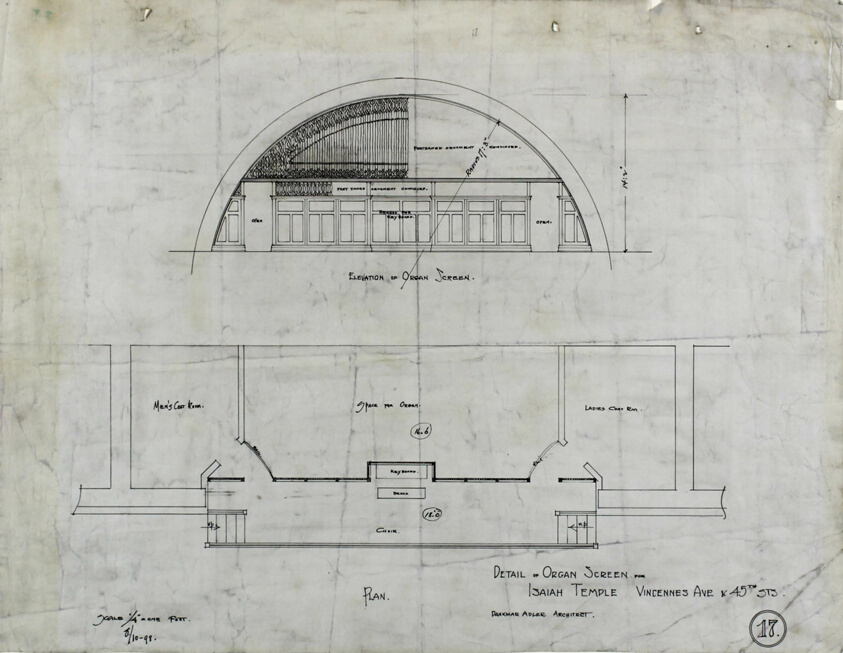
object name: Architectural Drawing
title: Isaiah Temple, Chicago, Illinois, Organ Screen Plan and Elevation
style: 19th century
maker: Dankmar Adler (American, 1844–1900)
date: 08/10/1898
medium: Black and brown ink on linen with pencil notations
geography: United States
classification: working drawing; architectural drawing; architecture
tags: temple, architecture, elevations (building divisions), pianos, Chicago